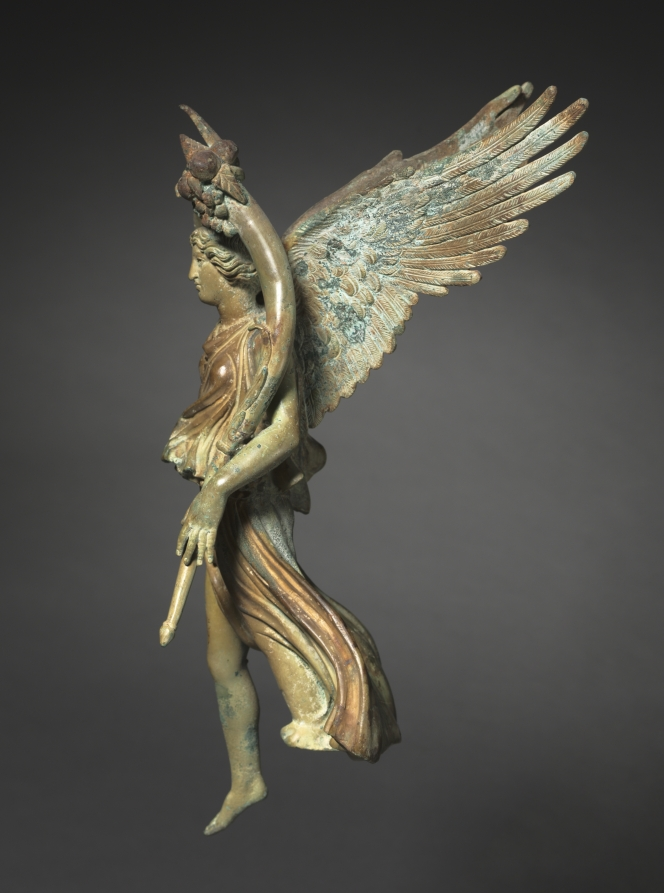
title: Victory with Cornucopia (Chariot Attachment)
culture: Italy, Rome, Imperial, later Julio-Claudian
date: 40–68 CE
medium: bronze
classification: Sculpture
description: In Roman times, the arrival of Winged Victory—touching down to earth, her drapery flying behind her—was a moment not just of military conquest, but was the first step toward peace and prosperity.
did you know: The cornucopia held by this Winged Victory overflows with fruits, grains, and other signs of abundance.